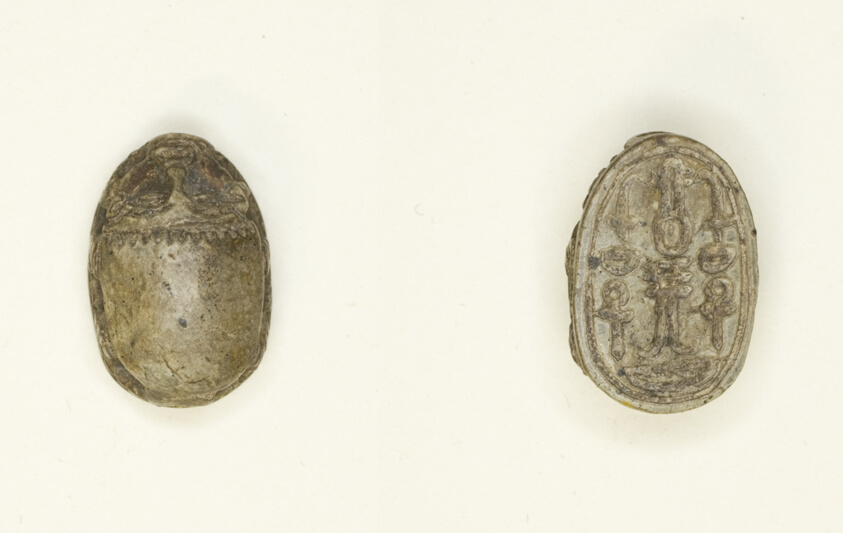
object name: Costume and Accessories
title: Scarab: Hieroglyphs (swt, nfr, Dd, anx, nb)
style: egyptian, middle kingdom, ancient, fifteenth dynasty, fourteenth dynasty, second intermediate period, thirteenth dynasty, twelfth dynasty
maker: Egyptian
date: Middle Kingdom–Second Intermediate Period, Dynasties 12–15 (about 1985–1550 BCE)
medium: Steatite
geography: Egypt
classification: scarab; ancient art; costume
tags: Hieroglyphs, insects